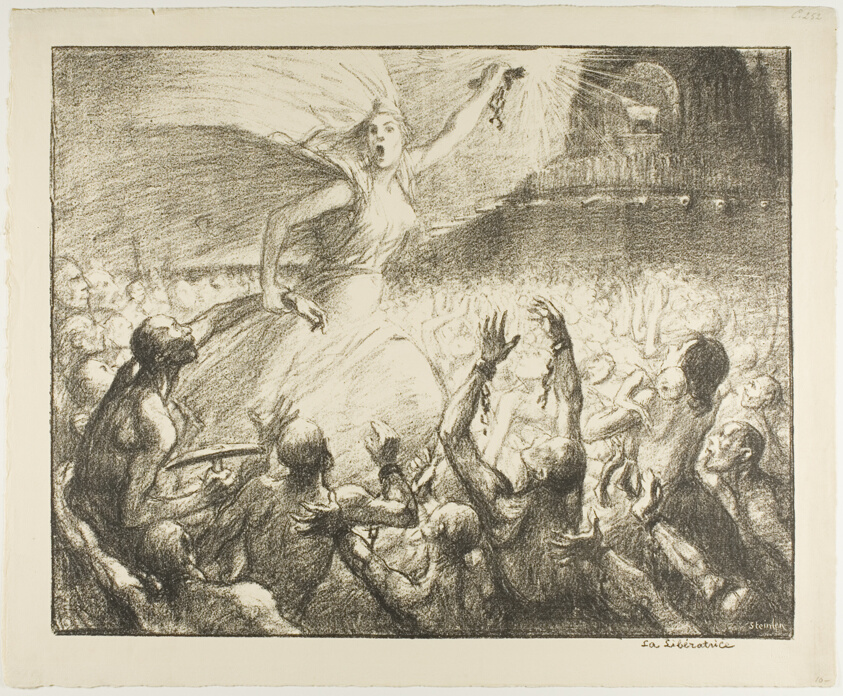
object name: Print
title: The Liberator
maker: Théophile-Alexandre Steinlen; French, born Switzerland, 1859-1923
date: 1903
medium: Lithograph in black on ivory laid paper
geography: France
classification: lithograph; print; prints and drawing